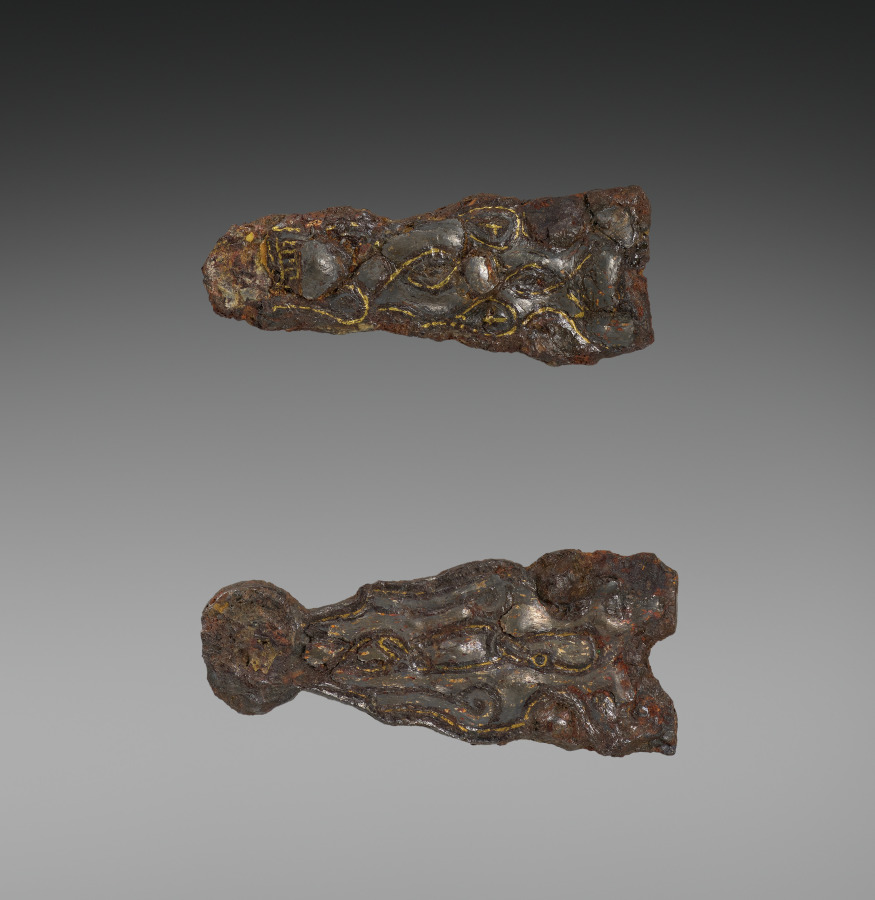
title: Buckles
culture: Merovingian, Burgundian, Migration period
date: 600s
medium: iron with silver overlay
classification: Jewelry